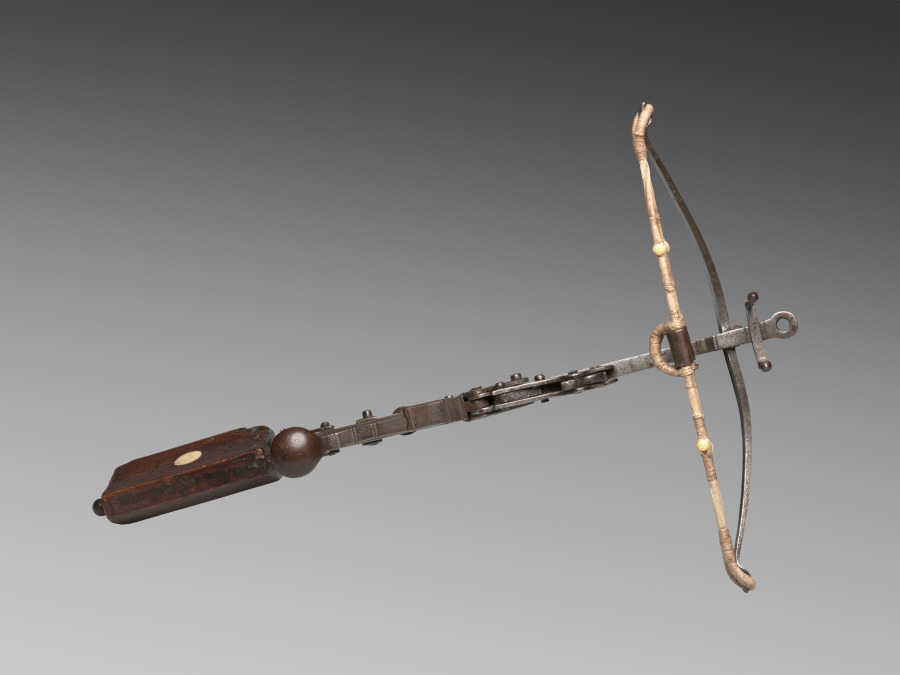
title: Pellet Crossbow for a Child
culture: Germany, early 17th Century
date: c. 1600–1650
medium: wood, bone inlay, steel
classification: Arms and Armor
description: This crossbow, made for the use of a small child, was designed to throw small stones or pellets. The bow string is an accurate replacement.